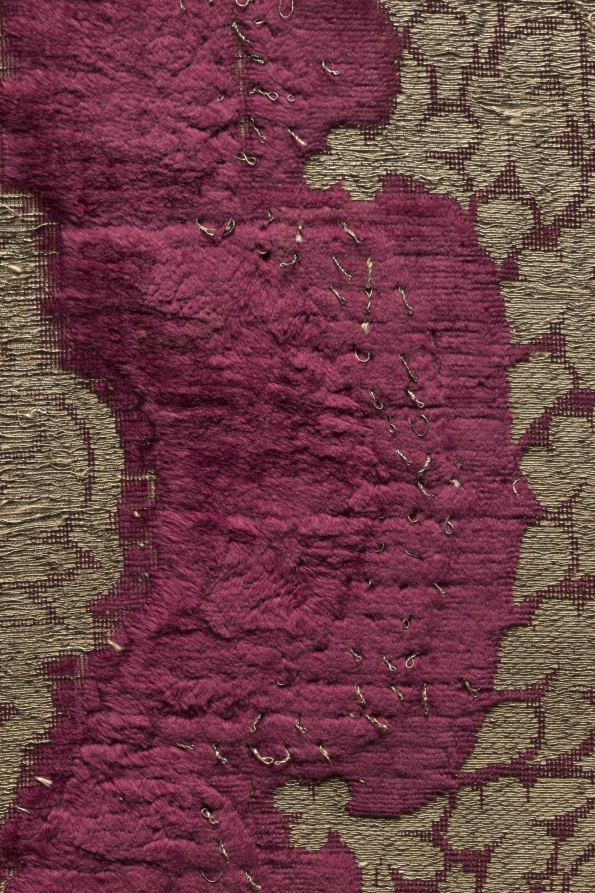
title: Velvet with Pomegranate Pattern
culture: Italy, Florence, 15th century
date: 1450–1500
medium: silk, gold thread; velvet: three heights of cut pile, gold thread loops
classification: Velvet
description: This extravagant Italian velvet with three heights of lush crimson pile is lavishly embellished with gold-thread loops. Large pomegranate patterns such as this were fashionable in Europe for more than a century, about 1420 to 1550, and were often featured in paintings and in large wall tapestries. Variations occurred in pattern details, pile height, and gold thread. Since pomegranates symbolized eternity, fertility, and resurrection, these velvets were often used in Roman Catholic churches. This pomegranate pattern inspired the cope, or cloak, worn by the Archbishop of Canterbury when he officiated the royal wedding of Prince William and Kate Middleton in 2011.